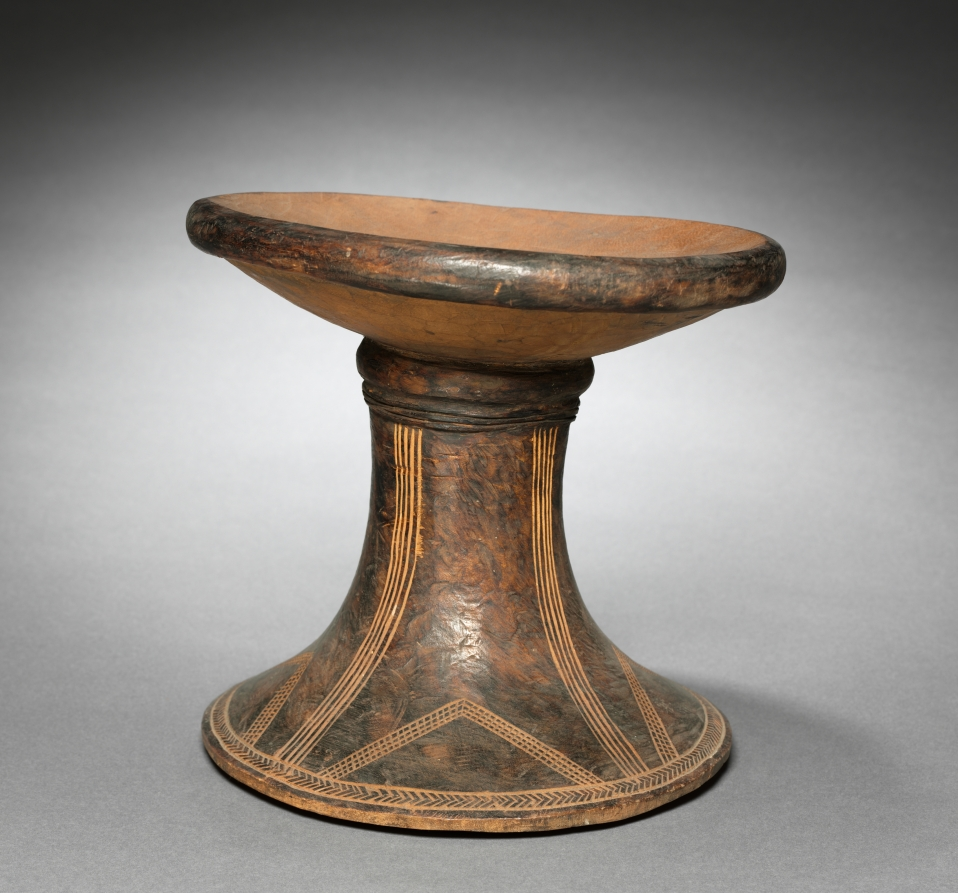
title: Stool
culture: Central Africa, Democratic Republic of the Congo, Nyanga, early 20th Century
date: before 1929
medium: wood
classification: Furniture and woodwork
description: Carved from a single piece of wood, Nyanga stools like this were multipurpose and took on different meanings depending on their use. Shaped like a curved hourglass, the shiny, patinated surface is textured with incised geometric designs. One use was for young male initiates to sit on as they received gifts from relatives following circumcision rites. The stools were oiled for the occasion, which results in the smooth, colored texture visible today.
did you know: This stool isn't asymmetrical, it's ergonomic! The seat tilts to make it more comfortable to use.